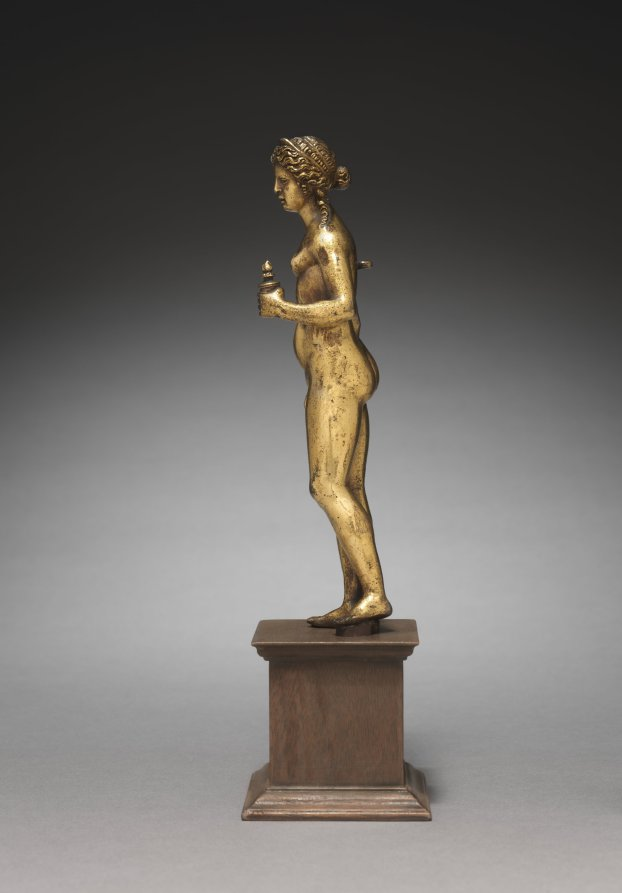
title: Venus with a Burning Urn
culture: Northern Italy, 16th century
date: c. 1500–1520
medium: gilt bronze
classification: Sculpture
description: Venus is the Roman goddess of many virtues, including Love, Charity, Fertility, and Victory. Here, Venus is represented as the goddess of Charity. She wears a crown, as Charity is often depicted as the Queen of the Virtues. The flaming lamp in Venus's left hand was also a symbol of Charity in Venice, where this piece is thought to have originated. The bent fingers of her right hand are bent suggest that Venus may have once held another object. Renaissance sculptors often looked back to antiquity when producing monumental and small bronze statues. The small bronze cabinet piece comes into Italian art during this time, bringing ancient gods and goddesses into Italian households. Venus stands in a contrapposto pose and, like Hellenistic and Roman objects, her locks are tied by a double ribbon while two curls fall on her shoulders. Her tilted head and large emotional eyes, as well as her small nose and parted lips reflect the influence of Hellenistic Greek facial styles.